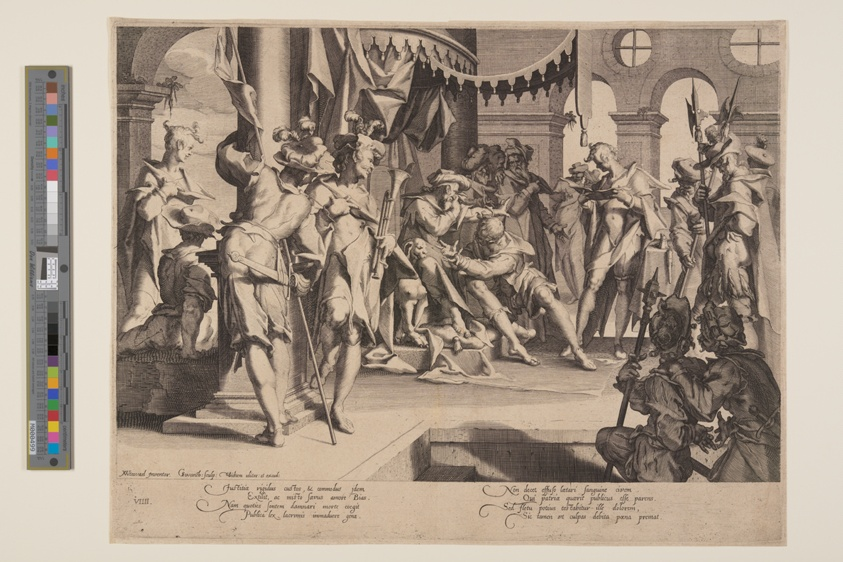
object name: Print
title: Judge Bias Shedding Tears, plate 9 from Thrones of Justice (Thronus Iustitiae)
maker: Willem van Swanenburgh (Dutch, 1580–1612); after Joachim Wtewael (Dutch, 1566–1638)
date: 1606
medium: Engraving on ivory laid paper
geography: Netherlands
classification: print; paper; prints and drawing; engraving